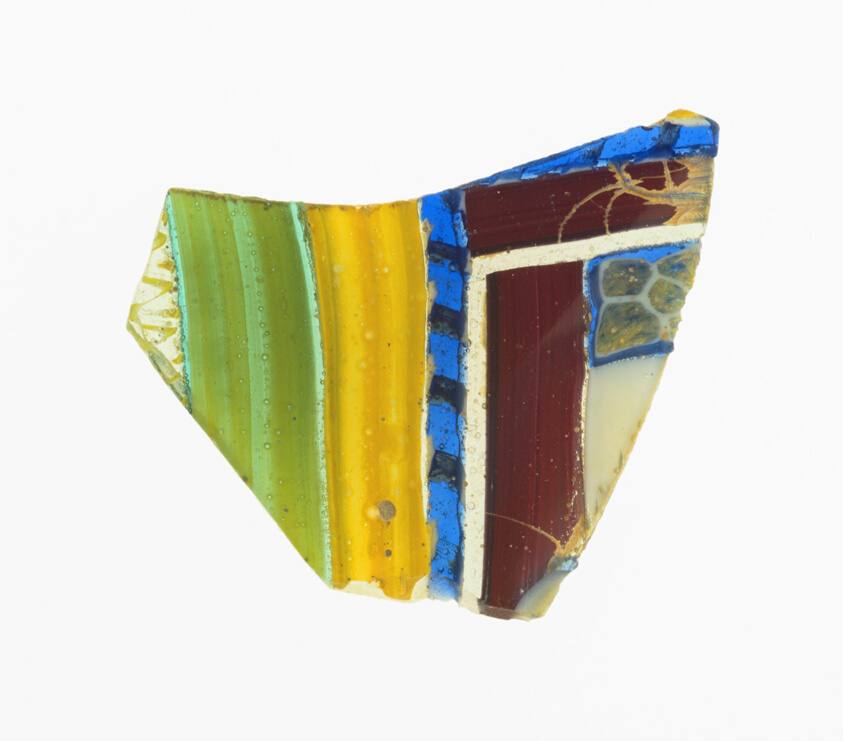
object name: Decorative Arts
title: Fragment of a Vessel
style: roman (ancient, style or period), ancient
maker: Roman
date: 1st century BCE–1st century CE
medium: Glass, mosaic glass technique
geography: Roman Empire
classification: fragment; decorative arts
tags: decoration